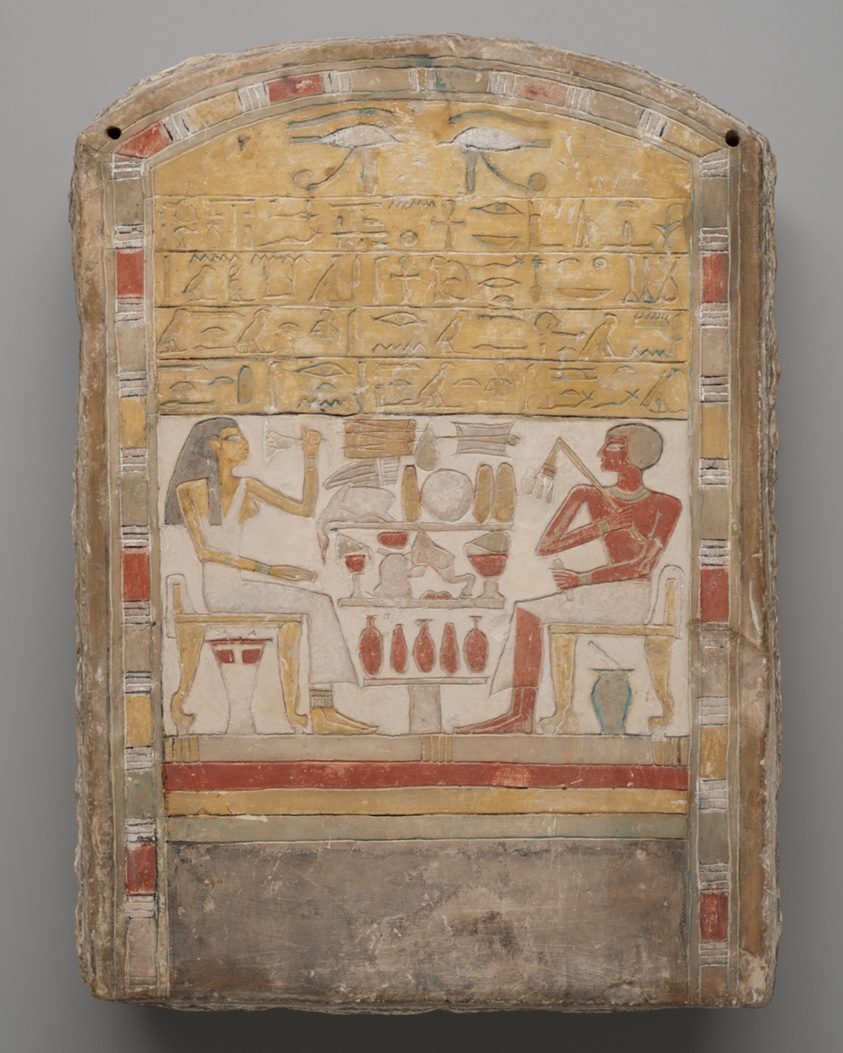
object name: Architectural fragment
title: Stela of Amenemhat and Yatu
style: middle kingdom, ancient, egyptian, thirteenth dynasty, twelfth dynasty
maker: Egyptian; possibly Memphis, Egypt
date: Middle Kingdom, late Dynasty 12–early Dynasty 13, about 1870–1770 BCE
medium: Limestone and pigment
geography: Egypt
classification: Stelae; sculpture; ancient art; funerary; architectural fragment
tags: funerary art, writing, beef, beer, Bread, chairs, eyes, fowl, Hieroglyphs, lotus, makeup, meat, men, mothers, sons, tables, vegetables, vessels, women